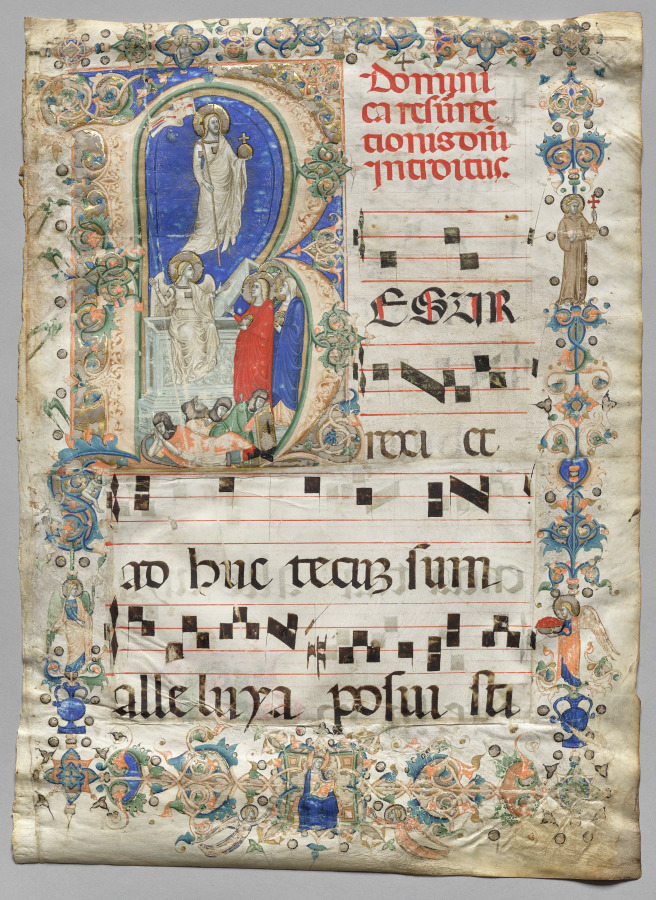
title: Leaf from a Gradual: Historiated Initial R: The Resurrection (recto)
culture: Italy, Naples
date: mid-1300s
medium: ink, tempera, and gold on parchment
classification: Manuscript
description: This leaf was taken from a gradual, a large volume containing songs for the mass. This single leaf shows the introductory passage for Easter Sunday. The initial R is filled with the representation of the resurrection of Christ. The depiction of Saint Francis of Assisi in the floral decoration points to an origin from a Franciscan monastery. Due to the great plague, the mendicant orders to which the Franciscans belonged were the recipients of civil charitable donations. Naples, where the leaf is said to have been made, was struck by a severe earthquake around the middle of the 1300s, in addition to the plague.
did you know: The Virgin Mary is shown twice on this leaf, once at the top standing to the side of the open tomb and again in the bottom border, crowned and holding the infant Christ.